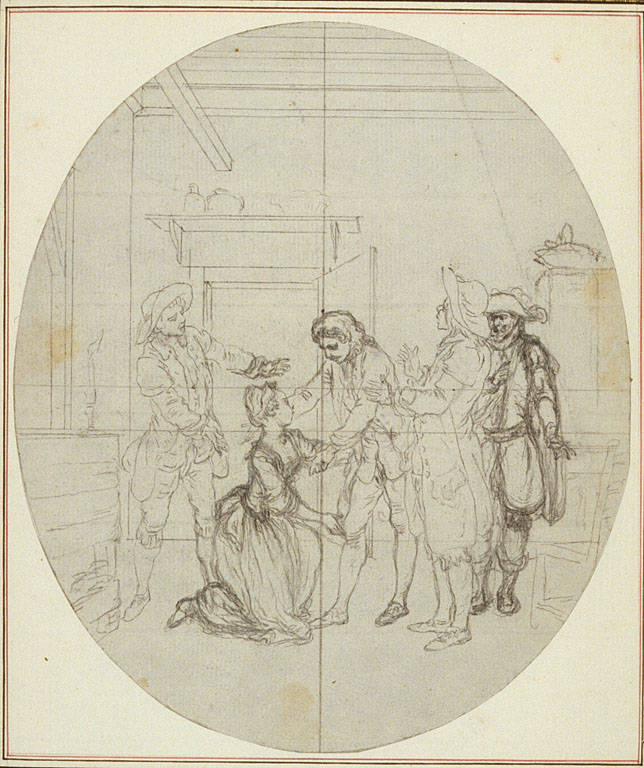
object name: Drawing and Watercolor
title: Study for a second edition, never published, of Colle's "La Partie de Chasse de Henri IV", Act III, Scene 11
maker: Hubert François Gravelot (French, 1699-1773)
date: before 1766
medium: Graphite, with black chalk, on oval-shaped pale gray laid paper, incised for transfer and perimeter mounted on ivory laid paper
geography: France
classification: graphite; drawings (visual works); prints and drawing